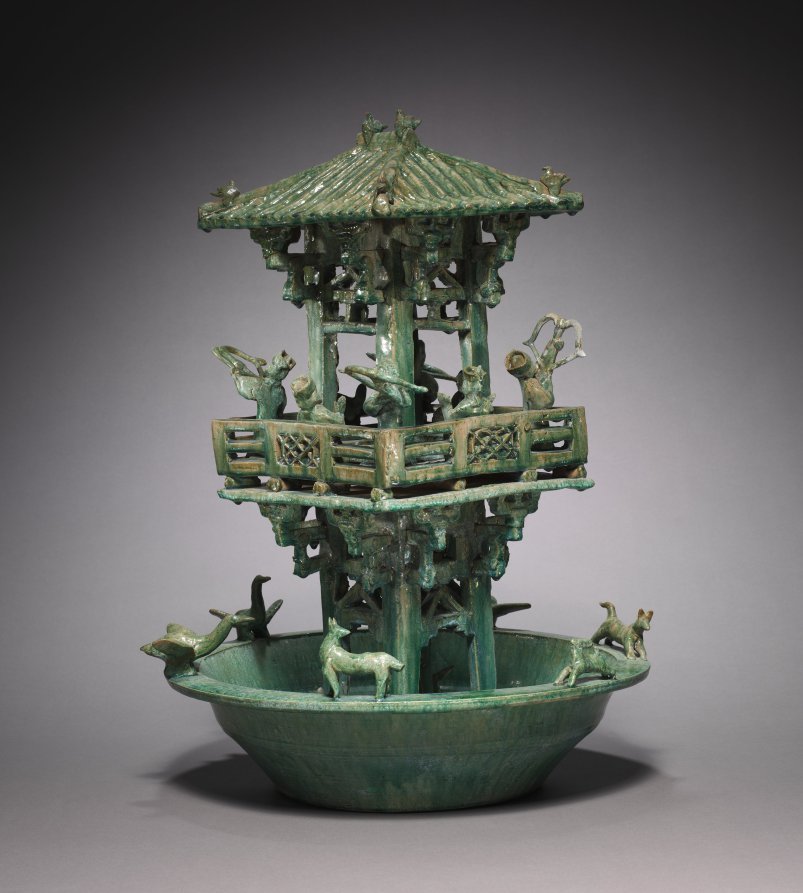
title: Watchtower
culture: China, Eastern Han dynasty (25–220 CE)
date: 25–220 CE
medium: earthenware with lead glaze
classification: Ceramic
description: In this funerary sculpture of the watchtower is a lively retinue of hunters, musicians, dancers, and domestic animals. The representation provides a vivid picture of the worldly enjoyment to be perpetuated in the otherworldly realm of the afterlife. A low-temperature lead glaze is applied to its earthenware body, enhancing the modeled forms with a brilliant, smooth coating like a layer of opaque glass.